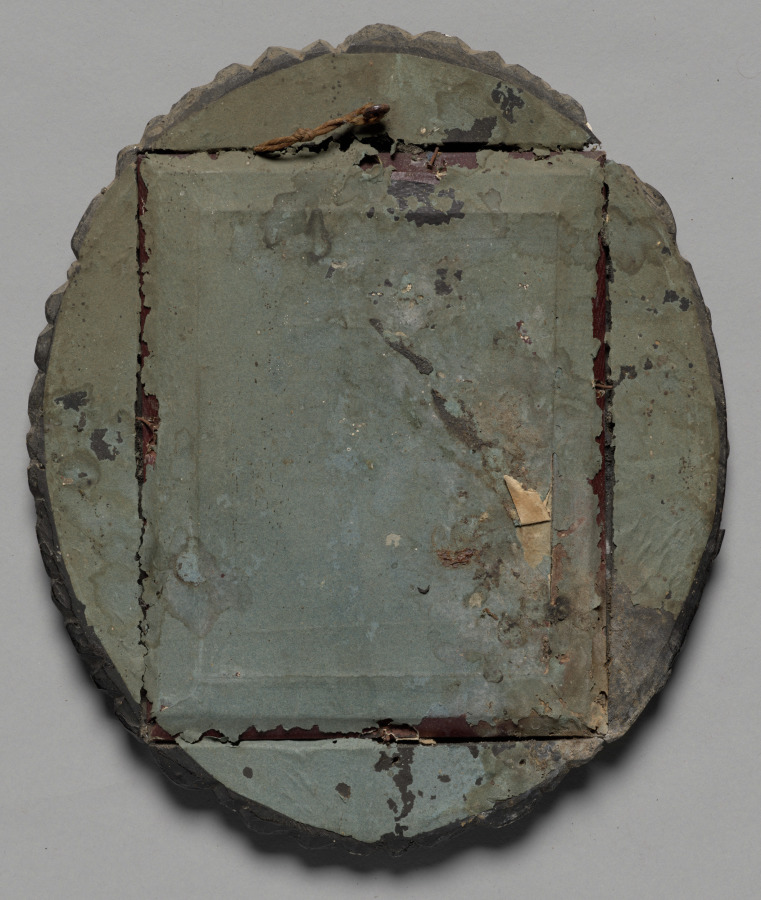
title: Brother and sister clasping hands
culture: France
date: c. 1860–65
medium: daguerreotype, half-plate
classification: Photograph